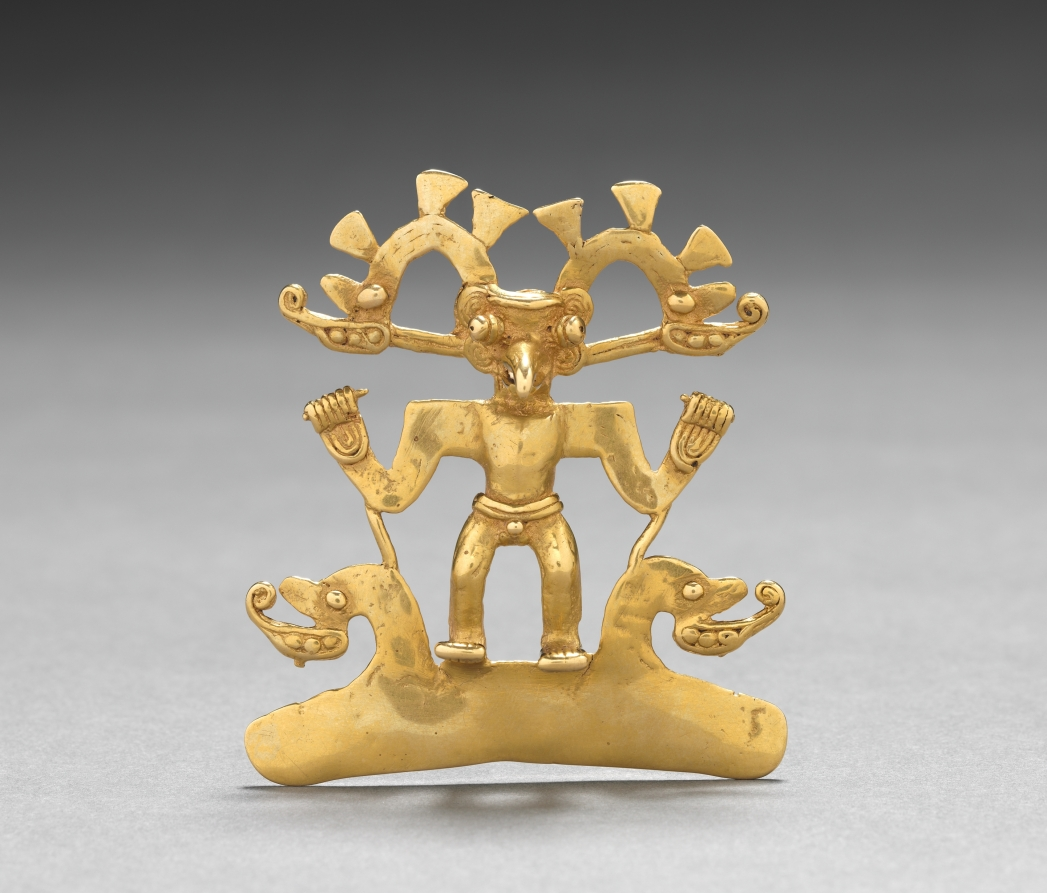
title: Bird-Man Pendant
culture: Western Panama, or Diquís, Costa Rica, Veraguas-Gran Chiriquí or Diquís Style, 8th-16th Century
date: c. 700–1550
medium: cast and hammered gold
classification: Metalwork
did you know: In the Panama-Costa Rica region, gold ornaments were associated with political and religious authority.